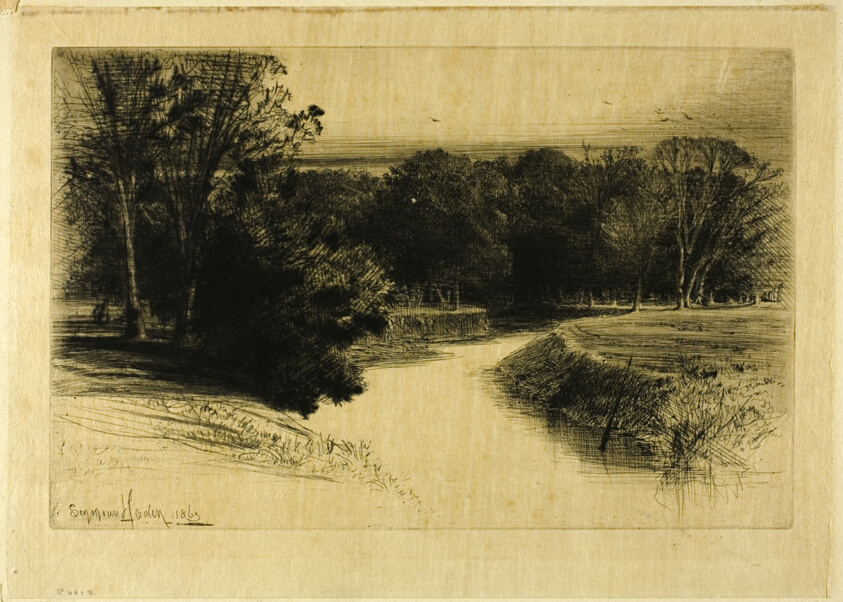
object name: Print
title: A Sunset in Ireland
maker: Francis Seymour Haden (English, 1818-1910)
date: 1863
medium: Etching and drypoint on ivory wove paper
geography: England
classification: drypoint; print; prints and drawing